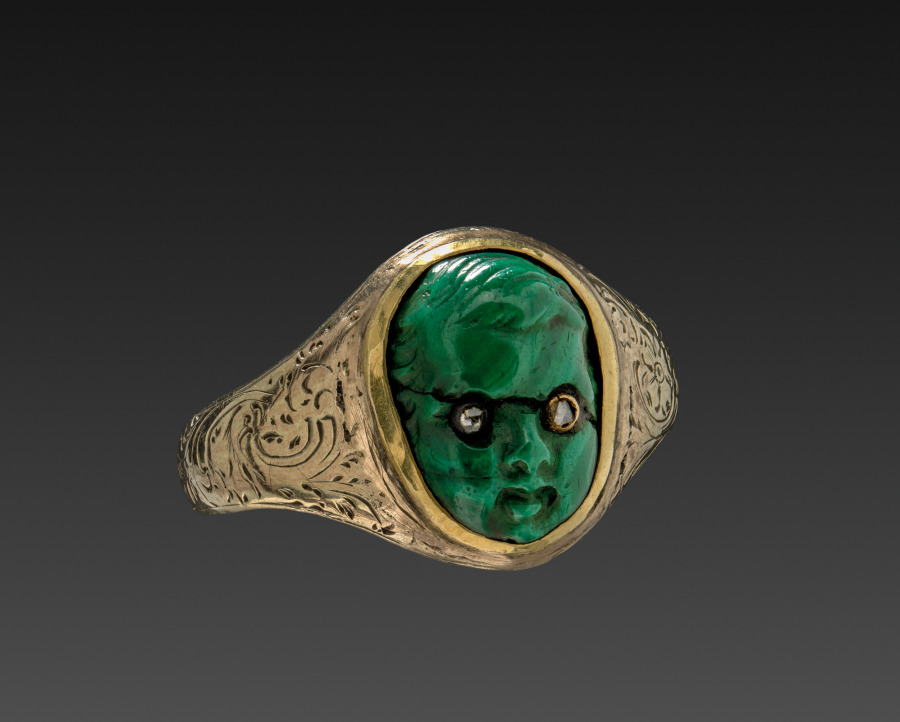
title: Ring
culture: America ?, 19th century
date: c. 1870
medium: gold band with green stone head set with diamond chips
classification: Jewelry